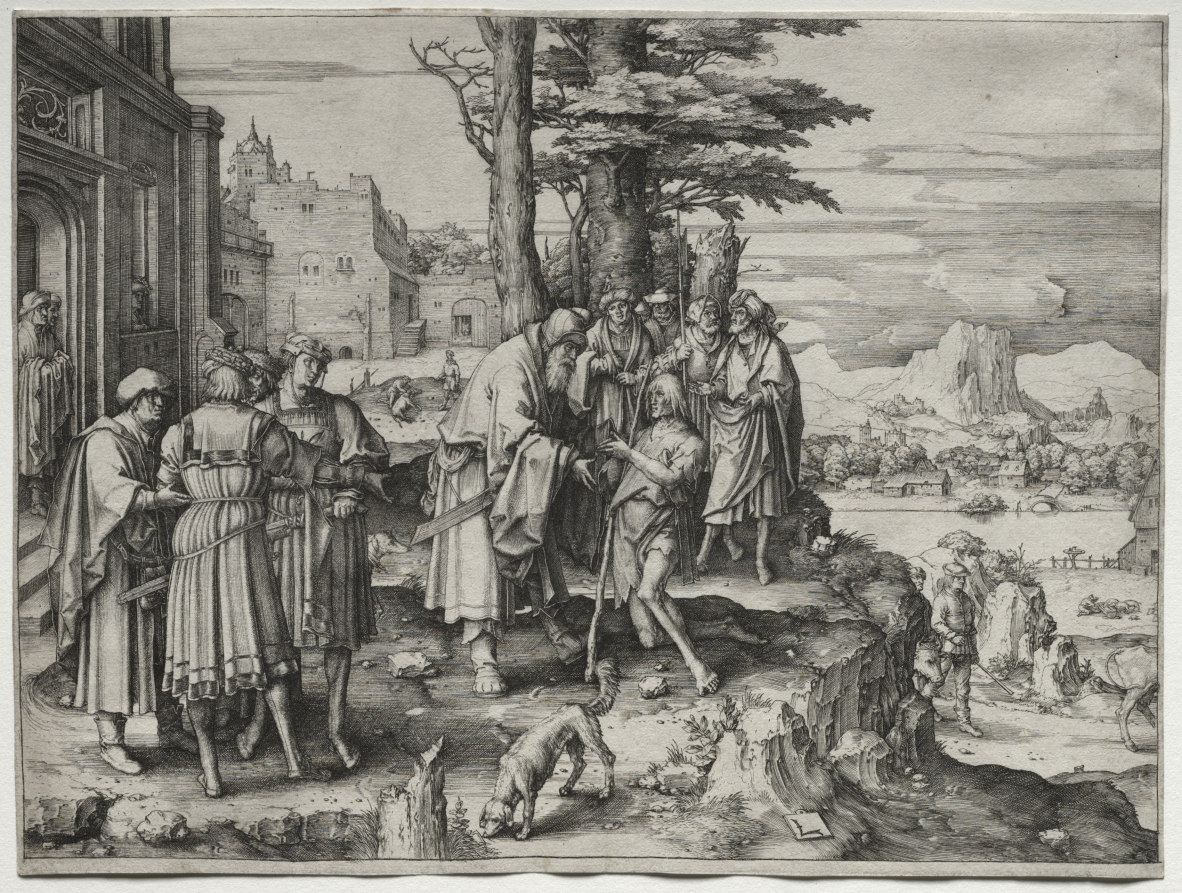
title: Return of the Prodigal Son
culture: Netherlands, 16th century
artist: Lucas van Leyden (Netherlandish, 1494–about 1533)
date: c. 1510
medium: engraving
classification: Print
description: A leading 16th-century Dutch printmaker and painter, Lucas van Leyden is credited with bringing a high degree of naturalism to the craft of printmaking. Although the landscape never became the primary subject, in prints such as Return of the Prodigal Son Lucas created a plausible yet imaginary setting.